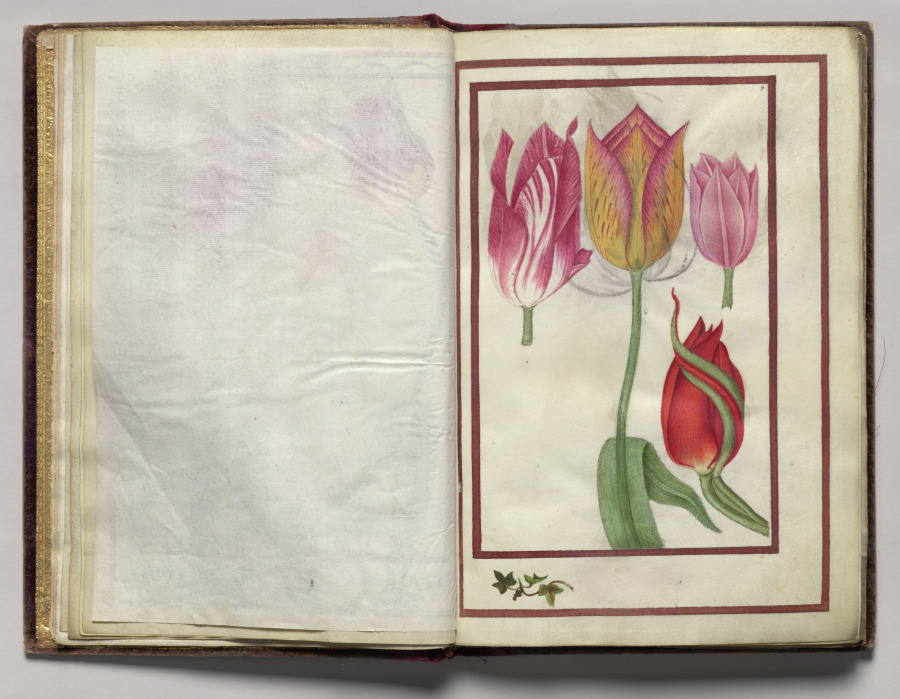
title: Tulips, folio 5 (recto), from Florilegium (A Book of Flower Studies)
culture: France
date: 1608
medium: watercolor, ink, silver, and gold over occasional traces of pencil, on vellum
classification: Bound Volume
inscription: Dated: Poitiers 1608 (on frontispiece) Signed: On frontispiece in black ink, lower right: Van Kuyk Notation on drawing: Frontispiece: in pencil, lower margin: * élève de Van Kessel, peintre flammand (* in pencil also appears in front of Van Kuyk's name).